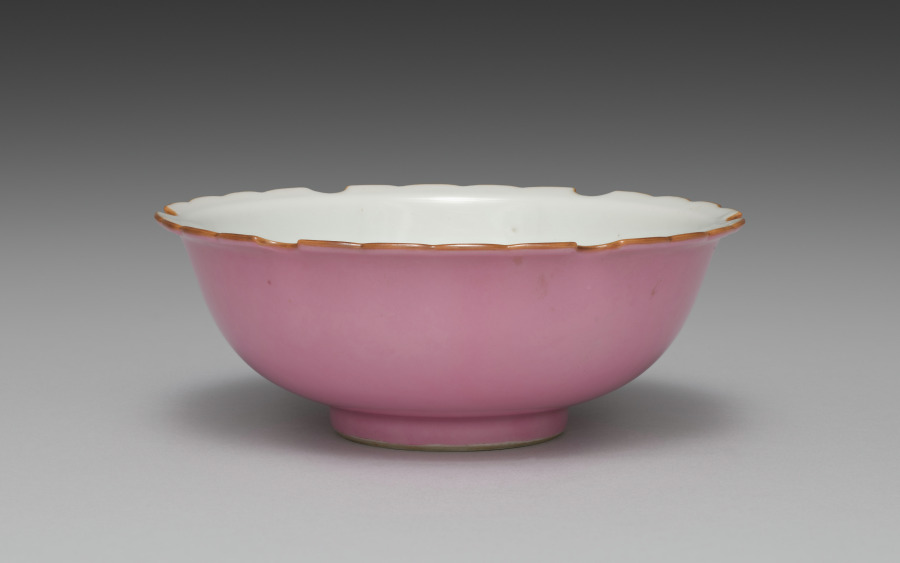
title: Dish from Snow-Flake Side Dishes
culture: Japan, Meiji period (1868–1912)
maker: Seifū Yohei III (Japanese, 1851–1914)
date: 1893–1914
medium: One from a set of six porcelain dishes; porcelain with lobed rims and pink glaze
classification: Ceramic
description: According to the box lid, this set of six side dishes, or mukōzuke, are “snow-flower style” (sekkashiki), having mouths shaped like snowflakes. Their mouths, which have six lobes and scalloped edges, are traced with brown iron oxide at the rim. The outside of each bowl is glazed with a very bright pink over the basin and foot, and the inside is left white. From directly above, one sees a snowflake-like shape, and from the side, they seem to float above a rosy ground.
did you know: The box for this set of dishes has an inscription on the side noting that they were for a person with the family name Nakamoto.